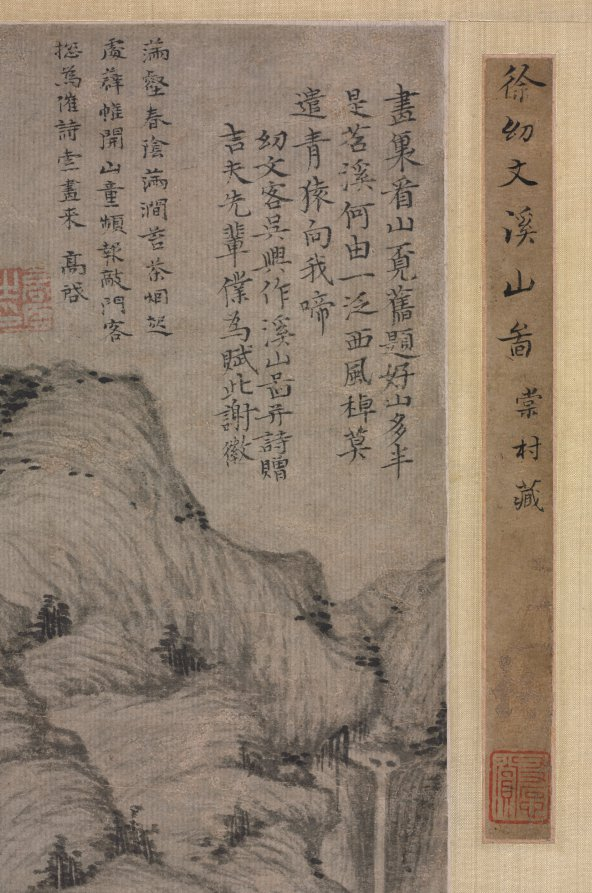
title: Streams and Mountains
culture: China, Yuan dynasty (1271-1368)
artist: Xu Ben (Chinese, 1335–1380)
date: 1372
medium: hanging scroll, ink on paper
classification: Painting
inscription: 綠樹黃鸝處處山， 偶從谿上看雲還。/ 人生未許全無事， 纔得登臨便是閑。 壬子七月十日徐賁為吉夫先生畫 並詩共上 [印] 幼文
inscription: Label on mounting probably by Liang Qingbiao 梁清標 (1620–1691).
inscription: 4 additional inscriptions and 9 additional seals: 1 poem of Xie Hui 謝徽 (c. 2nd half 14th c.); 1 poem and 1 seal of Gao Qi 高啟 (1336–1374); 1 poem and 1 seal of Lu Zhen 盧貞 (c. late 14th c.); 1 poem of Huang Zai 黃載; 3 seals of Liang Qingbiao 梁清標 (1620–1691); 1 seal of Wang Jiqian [C. C. Wang] 王季遷 (1907–2003); 3 seals unidentified.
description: Like many literati of the late Yuan and early Ming dynasties, Xu Ben was entangled with the perils of dynastic change as well as the ups and downs of his official career. It was mainly through the art of painting and poetry, as well as the ideal of reclusion, that he sought feelings of exhilaration and shared them with his friends. Xu created this monumental landscape during one of his periods of reclusion. His innumerable “hemp-fiber” texture strokes create a unifying rhythm among the towering mountains with tightly knit masses of rocks. Nestled among shady trees at the base of the mountain is a rustic retreat, which a scholar approaches on foot to visit with the hermit. Among the five inscriptions at the top of the painting is one by the artist himself. He dedicated the painting to someone named Jifu 吉夫 and recorded a poem in praise of mountains. Green trees, yellow orioles, everywhere are mountains; Aimlessly I return from the stream, where I watched the clouds. Man's life does not allow unbroken ease, But to be able to be high up in the mountain, this is leisure.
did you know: An attendant opens a reed gate to welcome the scholar with a walking stick approaching the rustic retreat.